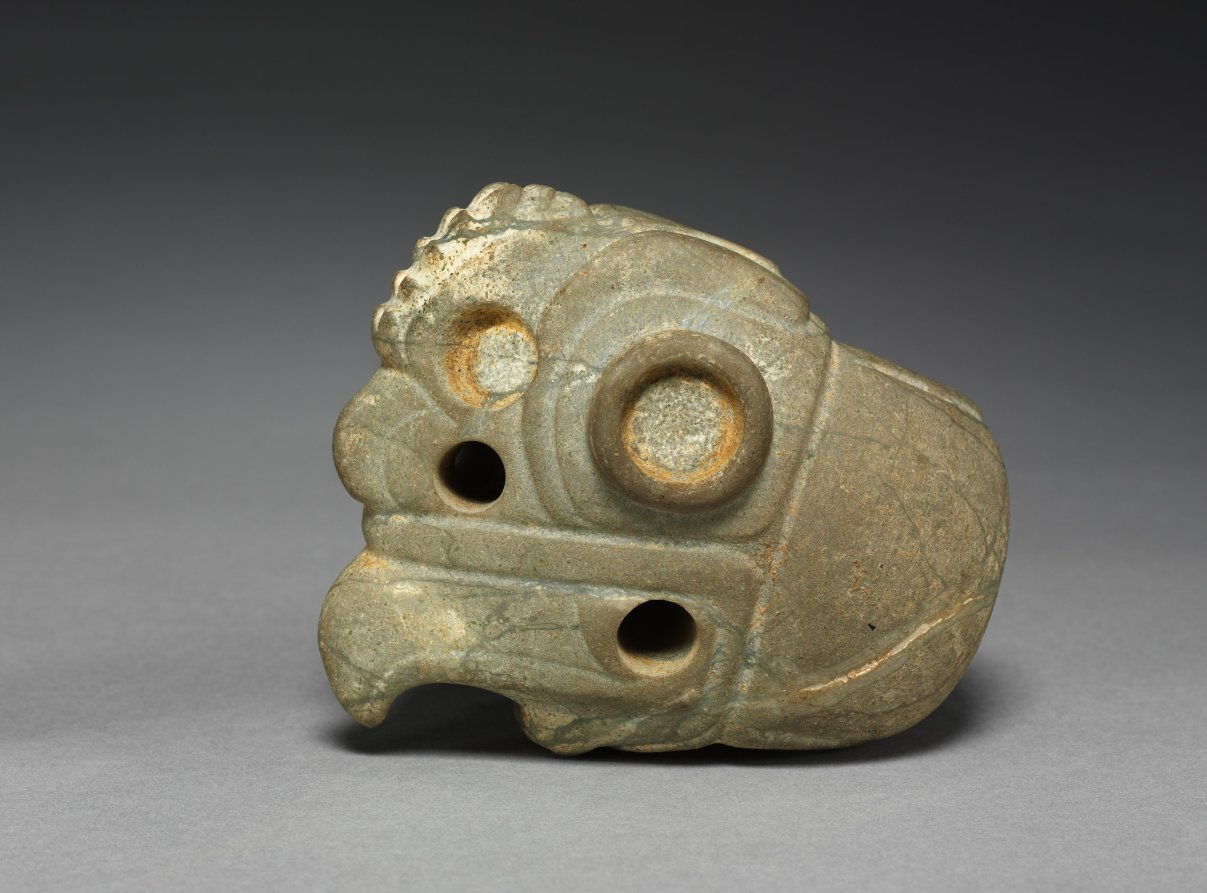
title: Ceremonial Mace (Club) Head: Bird (Male Curassow?)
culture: Costa Rica, Southern Nicoya region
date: 300 BCE–600 CE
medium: stone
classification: Sculpture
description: Probably once mounted on wooden shafts, these objects could have served as symbols of chiefly authority, group insignia, the heads of ceremonial weapons, or all three. They eventually were placed in elite graves. The bird may be a male curassow and the feline, a jaguar.